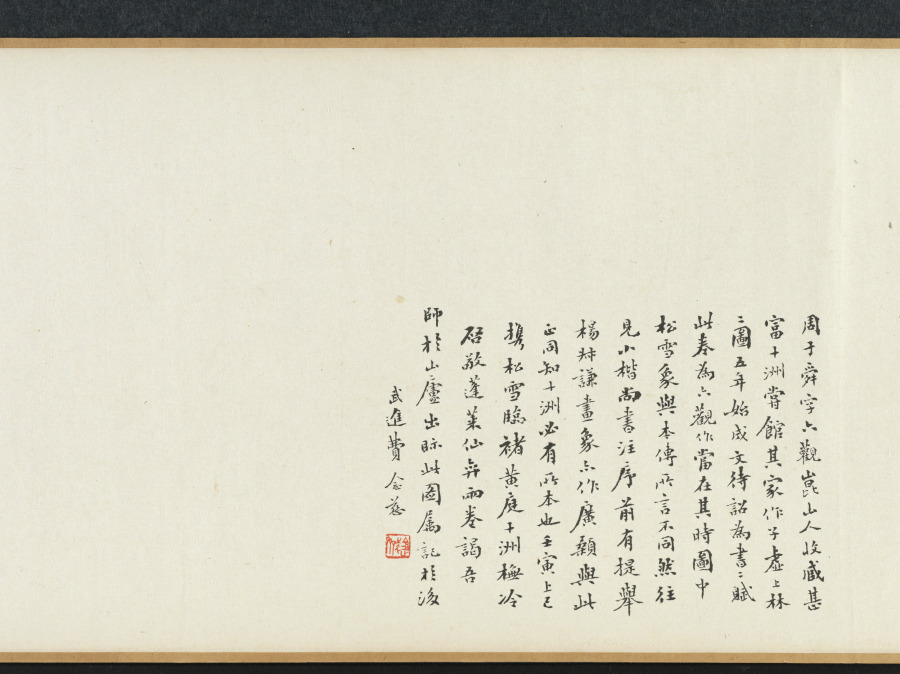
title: Zhao Mengfu Writing the Heart (Hridaya) Sutra in Exchange for Tea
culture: China, Ming dynasty (1368–1644)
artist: Qiu Ying (Chinese, 1494–1552)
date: 1542–43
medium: handscroll, ink and light color on paper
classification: Painting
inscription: Inscription accompanying text of "Heart" sutra, by Wen Zhengming 文徵明 (1470-1559): Zhengming 徵明, written in a boat at Kunshan 崑山, on the twenty-first day of the ninth month, in the renyin 壬寅 year, the twenty-first year of the Jiajing era [1542].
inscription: Colophon by Wang Shih-mou: Chou Yü-shün [Feng-lai] of K'un-shan was a scholarly, refined connoisseur of antiquities. He had acquired the poem written by Chao Ch'eng-chih [Chao Meng-fu] about the exchage of tea for Chao's calligraphy of the Prajna sutra. But the sutra itself, also written by Chao Meng-fu, is lost. He therefore asked Ch'iu Shih-fu [Ch'iu Ying] to do a painting and had Wen Cheng-ming, the artist-in-attendance, write the Hridaya Sutra in the "small, regular" style for replacement. Both works are so excellent that even Chao Meng-fu himself would certainly applaud if he should be reborn to see them. I, Shih-mou, had gotten possession of this scroll from the family of Chou Yü-shün, and since it was so wonderfully matched with one of the treasures in my collection. the Hridaya Sutra written by Chao Meng-fu for Priest Li in "running script," like the reuniting of two halves of a jade pi, I completed the scroll with the several colophons written for the "tea-exchange" poem. I did this because the painting of Ch'iu Ying and the calligraphy of Wen Cheng-ming are definitely masterpieces by themselves with absolutely no need to depend on any of the colophons written for the Chao Meng-fu poem. Furthermore, the two sons of Wen Cheng-ming, Shou-ch'eng [Wen P'eng] and Hsiu-ch'eng [Wen Chia]. have each written a colophon explaining the reason for replacing the calligraphy. As their writings are both acceptable for high standard, I didn't want to throw them away. [So by separating these into two scrolls] I was able to get two complete works of art in one clever stroke. I was quite pleased with myself, and hope that those who see this scroll shall not get suspicious because of the missing colophons. Wang Shih-mou wrote in his Jih-sun-chai study, on the first day of the tenth month, in the chia-shen year of the Wan-li era [1584].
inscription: Colophon by Wen P'eng: I-shao [Wang Hsi-chi] wrote in exchange for a flock of geese. Su Tung-po wrote in exchange for meat. Both episodes have become legends of a thousand years. Sung-hsüeh [Chao Meng-fu] "teased" Priest Kung for tea, and the story was immediately immortalized in the poems by all the famous scholars of the times. Indeed, how could one say his humor and elegance are not equal to the ancient worthies? Unfortunately, the poetry has survived but the writing of the sutra is lost. Yü-shün [Chou Feng-lai] therefore asked my father to make up the writing and so here is the complete work of art. Respectfully inscribed by Wen P'eng in the mid-summer of 1543.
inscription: Colophon by Wen Chia: Sung-hsüeh [Chao Meng-fu], in exchanging tea leaves for his writing of the Prajna, had put himself in the company of Yu-chün [Wang Hsi-chih] who exchanged geese for his writing of the Huang-t'ing sutra [the Yellow Chamber, or the Wai-ching ching, a Taoist text attributed to the Yellow Emperor]. However, was this romantic and cultivated gesture really intended for such small things? Actually, he was only proud that the excellence of his calligraphy had made him worthy to be the successor of the Ch'in Dynasty master. Since, very unfortunately, Chao Meng-fu's writing [of the Prajna] was already lost, my father therefore agreed to replace it, and did the calligraphy in the style of the Yellow Chamber. In addition, Yu-shün [Chou Feng-lai] had asked Mr. Ch'iu Shih-fu [Ch'iu Ying] to do a painting of the sutra writing story in the style of Li Lung-mien at the head of the scroll. Now it would seem the entire episode should go down in history for immortality. Respectfully recorded by Wen Chia, on the eighth day of the eighth month, in the year of k'uei-mao [1543]. trans. WKH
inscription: 4 colophons and 23 seals: 1 colophon, dated 1543, and 2 seals of Wen Peng (1498-1573); 1 colophon, dated 1543, and 2 seals of Wen Chia (1501-1583); 1 colophon, dated 1584, and 3 seals of Wang Shih-mou (1536-1588); 2 seals of Chou Feng-lai (16th c.); 3 seals of Sung Lo (1634-1713); 5 seals of the Ch'ien-lung emperor (r. 1736-95); 1 colophon, dated 1902, and 1 seal of Fei Nien-tz'u (1885-1905); 4 seals of Wan-go H. C. Weng (b. 1918); 1 seal unidentified.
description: The Yuan dynasty calligrapher Zhao Mengfu (1254–1322) is said to have transcribed the Heart Sutra for a certain priest named Li in exchange for tea. Later, during the Ming dynasty, the professional painter Qiu Ying from Suzhou painted this scene for his patron. Here, Zhao Mengfu holds a brush and has a piece of paper laid out before him. On the table is an ink stone, an ink stick, and a small water dropper. Drops of water would dissolve the ink stick into liquid ink when it was ground on the flat square stone.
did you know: Qiu Ying was born to a peasant family, but his natural talent led him to a successful career as a professional painter with wealthy patrons.